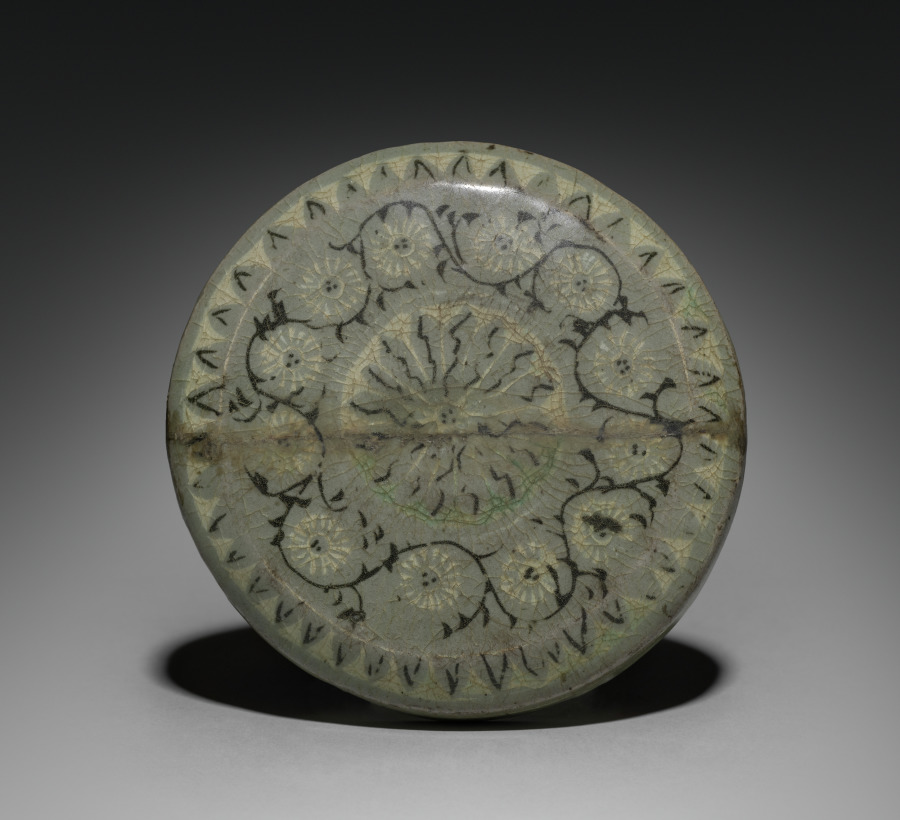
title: Box (lid)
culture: Korea, Goryeo dynasty (918–1392)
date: 918–1392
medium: pottery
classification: Ceramic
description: Celadons, spoons, seals, and bronze mirrors were the most common burial objects in tombs during the Goryeo period (918–1392). Once used to contain colored powder, rouge, and eyebrow gel for makeup, this small container was one of the standard goods that furnished tombs of the elites. Both women and men used the grain powder of rice or millet for whitening their skin, safflower extract for rouge, and plant ash or soot for eyebrow gel. Yet, natural-looking makeup seems to have been the most favorable one in Korea according to the travelogue by Xu Jing (1091–1153), the Chinese diplomat who visited Korea in 1123.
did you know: This ceramic container was used to store either incense or cosmetics.